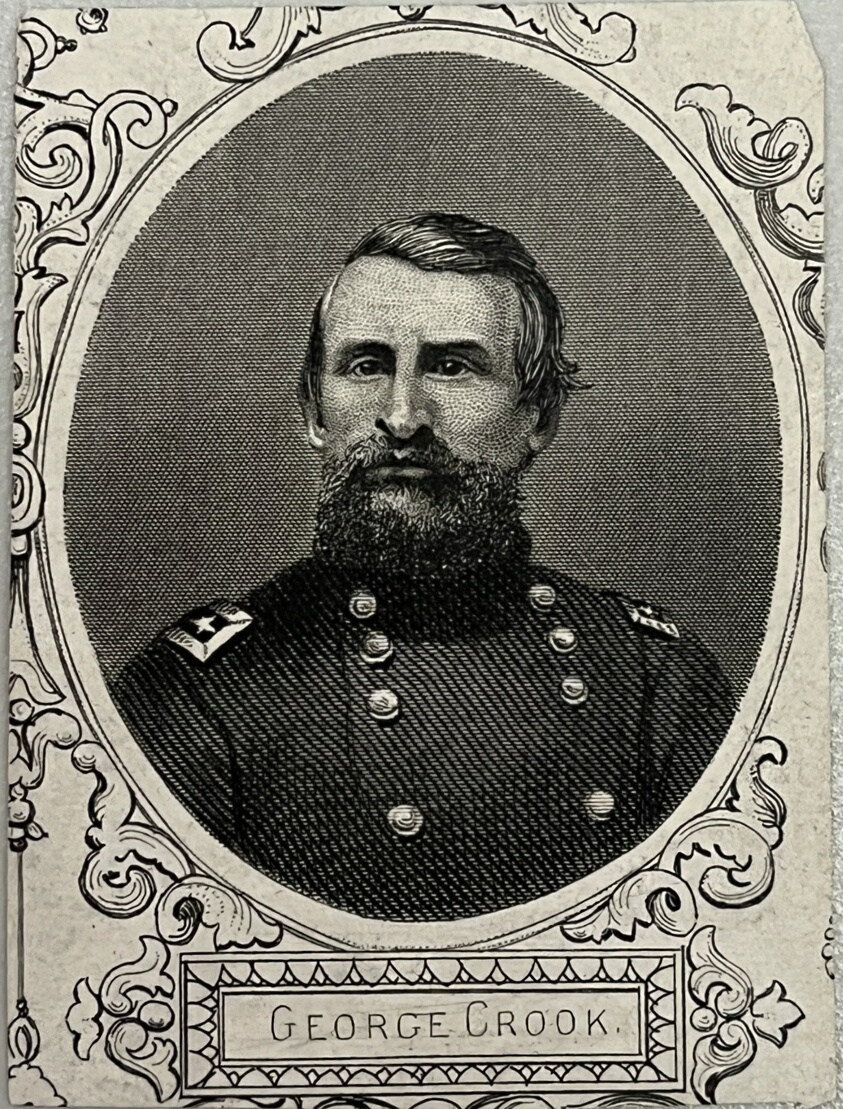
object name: Print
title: George Crook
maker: Artist Unknown (Likely American or British, 19th century)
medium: Etching on paper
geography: United States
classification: reproduction; print; prints and drawing